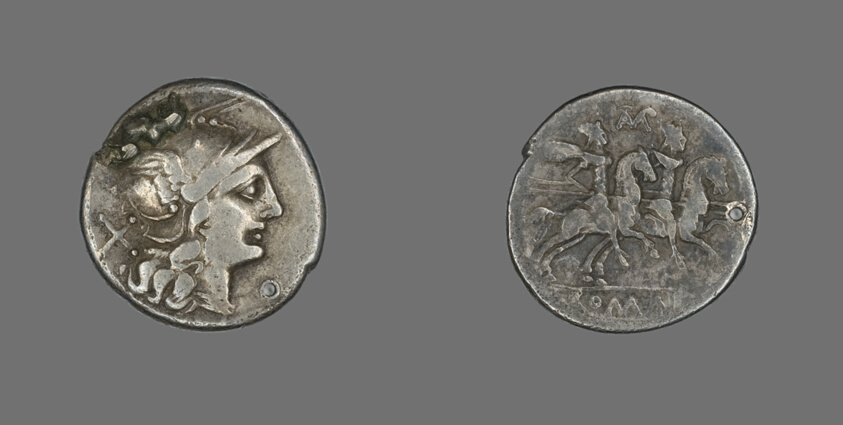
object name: Coin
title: Denarius (Coin) Depicting the Goddess Roma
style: roman (ancient, style or period), ancient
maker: Roman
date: 189-180 BCE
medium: Silver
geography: Roman Empire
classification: coin; ancient art